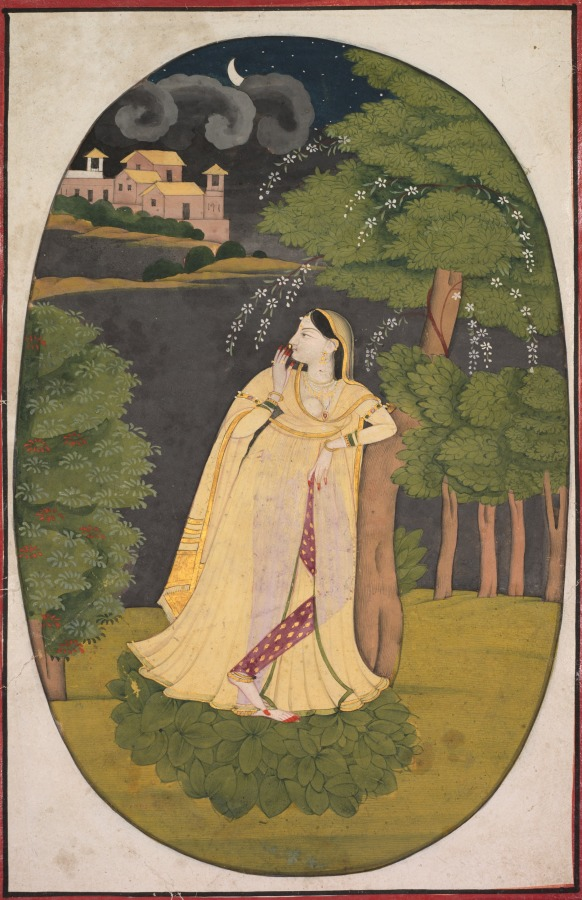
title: The heroine who waits anxiously for her absent lover (Utka Nayika)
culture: Northern India, Pahari kingdoms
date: c. 1800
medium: Gum tempera on paper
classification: Painting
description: Inspired by devotional poetry that likens the waiting for divine favor to that of a woman alone in the forest waiting for her lover, Pahari painters mastered portrayals of this subject. Darkness has fallen, but the moon and stars and jasmine flowers brighten the night. However, monsoon clouds approach in the distance, suggesting impending danger and misery. Her gesture and expression suggest a mixture of hope and heightened uncertainty about how much longer she should continue to wait.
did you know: Utka Nayika is often shown standing or resting on a bed of leaves.